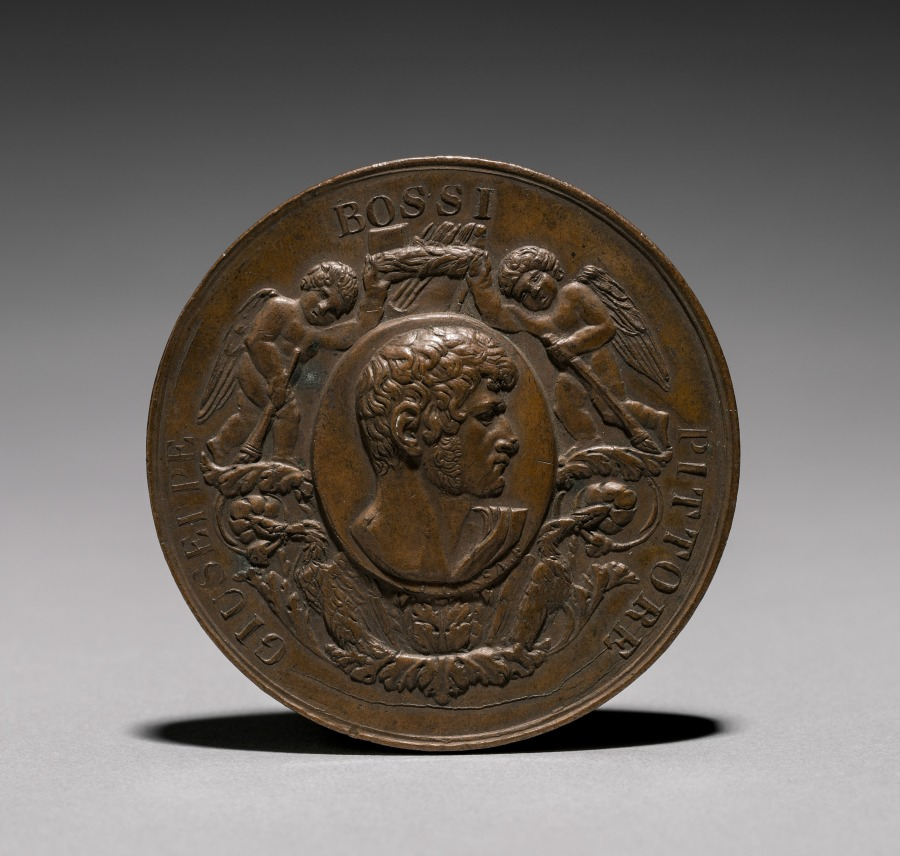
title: Medal: Guiseppe Rossi Pittore (obverse)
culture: Italy, 19th century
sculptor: Luigi Cossa (Italian, 1789–1867)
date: early-mid 1800s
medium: bronze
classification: Metalwork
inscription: "GUISEPPE ROSSI PITTORE"; signed: "L. Cossa. F."